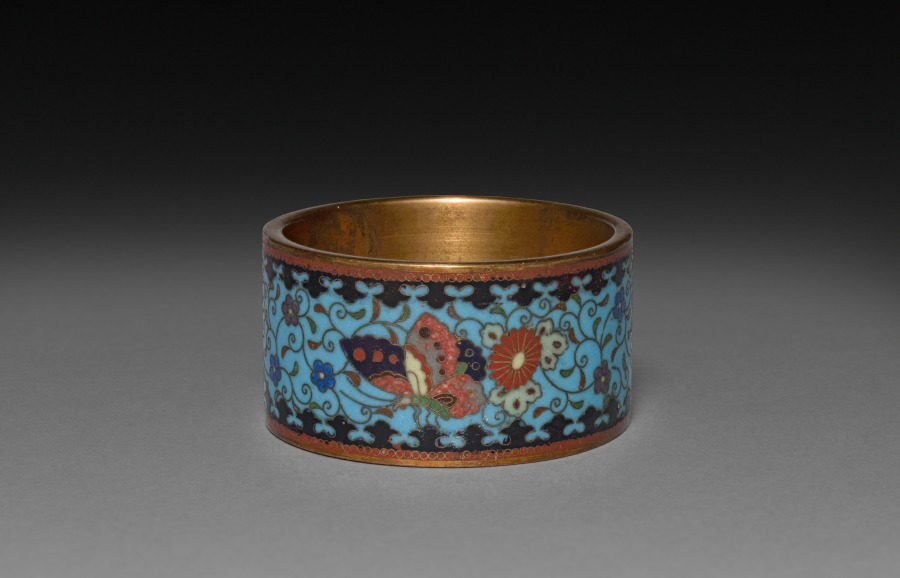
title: Napkin Ring with Butterflies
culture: Japan, Meiji period (1868–1912) or Taishō period (1912–26)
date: early 1900s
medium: cloisonne enamel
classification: Enamel